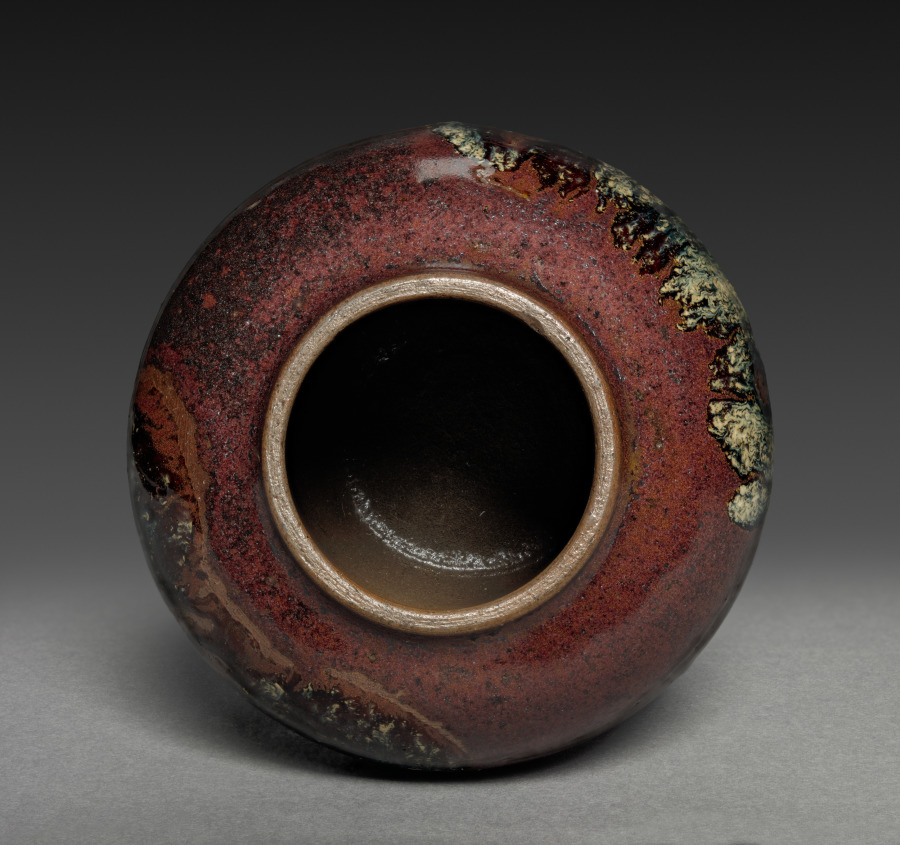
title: Inverted Pear-Shaped Jar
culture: Japan, Edo period (1615–1868)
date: 1800s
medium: pottery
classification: Ceramic